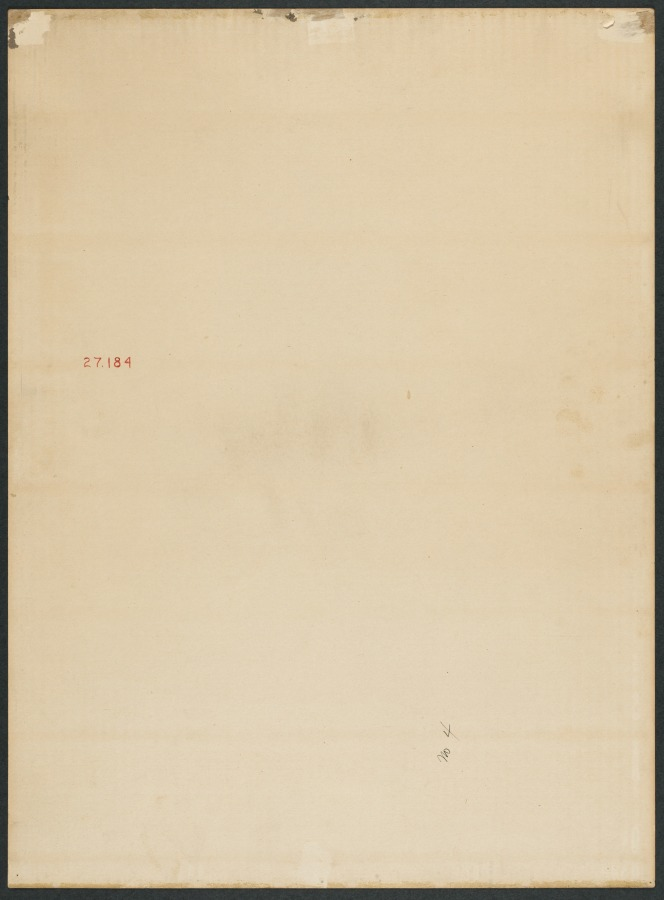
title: Boy on a Chair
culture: America, Ohio, Cleveland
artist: William Sommer (American, 1867–1949)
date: 1927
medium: watercolor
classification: Drawing